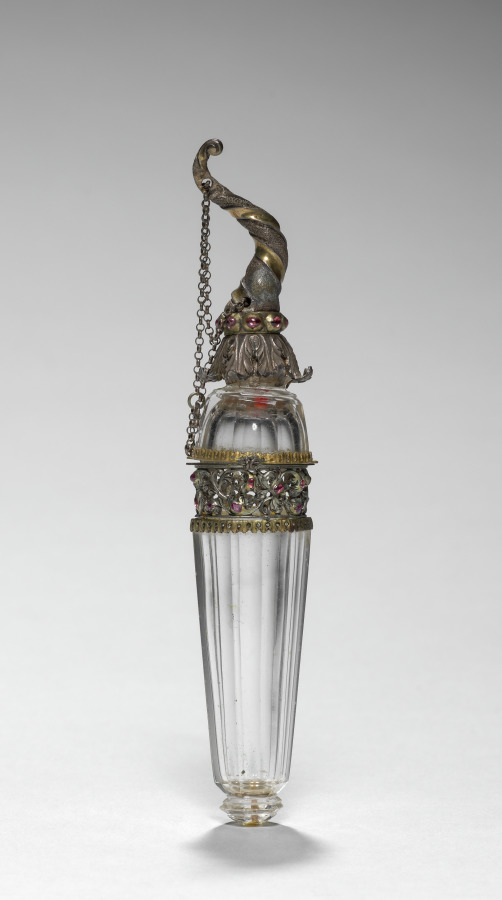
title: Scent Bottle (Vinaigrette)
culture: France, 19th century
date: 1800s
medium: glass mounted in silver (?) partially gilt and set with pink cabochon stones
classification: Miscellaneous